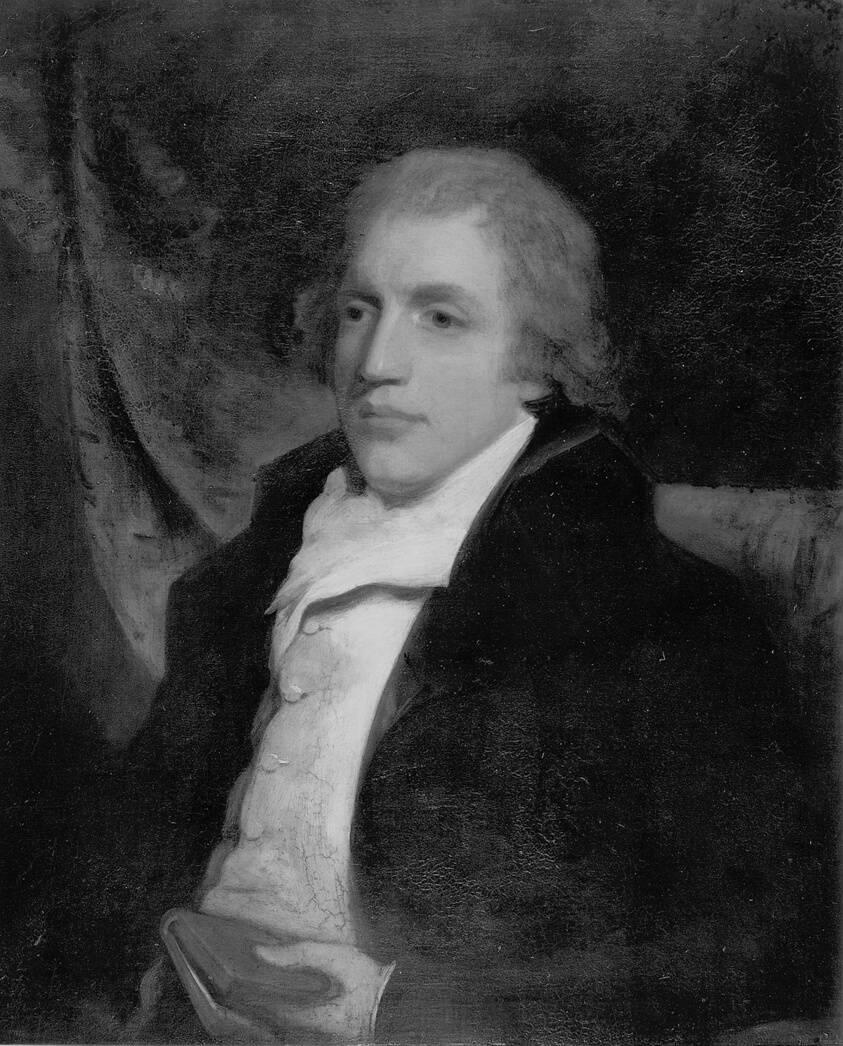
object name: Painting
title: William Gifford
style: nineteenth century, 19th century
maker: After John Hoppner (British, 1758-1810)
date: c. 1800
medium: Oil on canvas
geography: England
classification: oil on canvas; british; oil paintings (visual works); paint; portrait; painting; european painting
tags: portraits: male subject, book, cloth, man, portrait, portraits